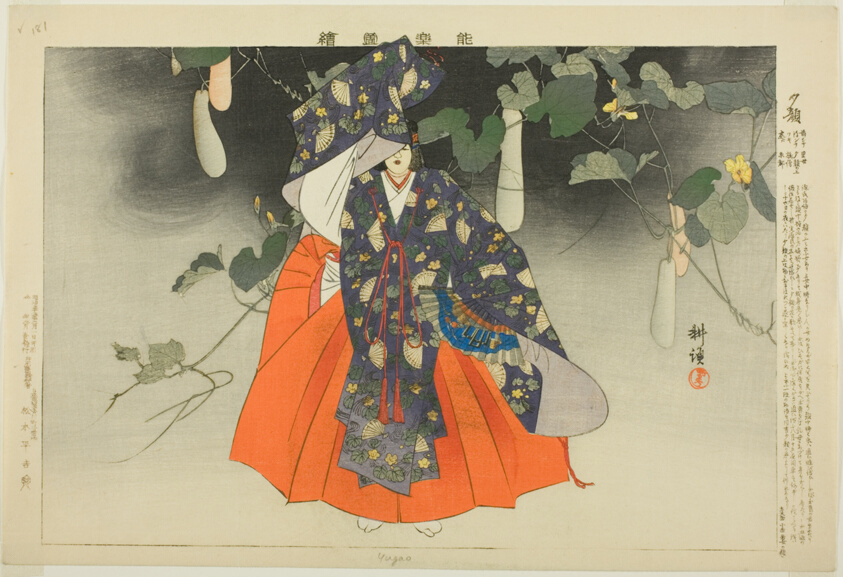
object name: Print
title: Yugao, from the series "Pictures of No Performances (Nogaku Zue)"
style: Japanese (culture or style)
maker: Tsukioka Kogyo; Japanese, 1869-1927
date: 1898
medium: Color woodblock print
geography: Japan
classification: woodblock print; print; asian art